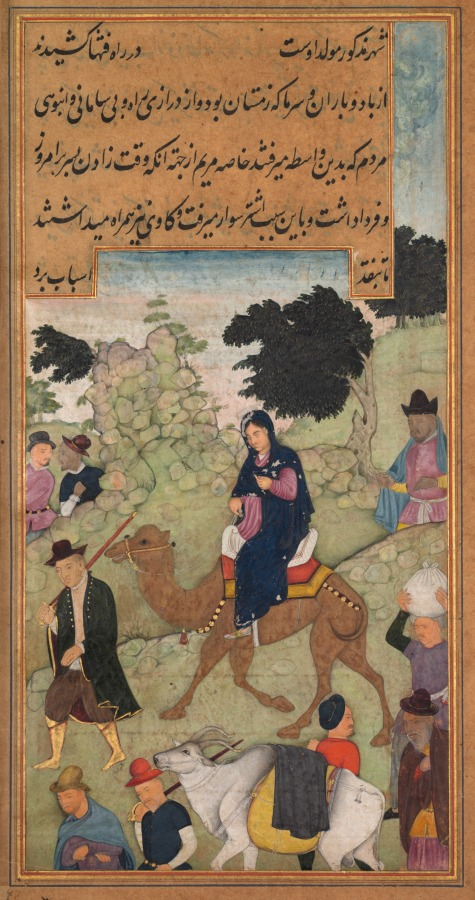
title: Mary and Joseph Travel to Bethlehem (folio 24 verso), from a Mirror of Holiness (Mir’at al-quds) of Father Jerome Xavier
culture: Mughal India, Allahabad, made for Prince Salim (1569–1627)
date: 1602–4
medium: Gum tempera, ink, and gold on paper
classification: Manuscript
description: Joseph leads the heavily pregnant Mary riding on a camel. In the text Father Jerome wrote that Mary rode a “pack beast,” so the Indian artist opted to portray her on a camel. An ox in the foreground carries their belongings, and the bent trees indicate the journey’s harsh conditions. They are on the way to Bethlehem, the city of King David, from whom Joseph was descended, in order to register for a census. Father Jerome often emphasized the royal lineage of Jesus, apparently in an effort to impress the Mughals.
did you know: Wearing a green coat, Joseph carries a sword over his shoulder, suggesting that he is ready to face any potential trouble.